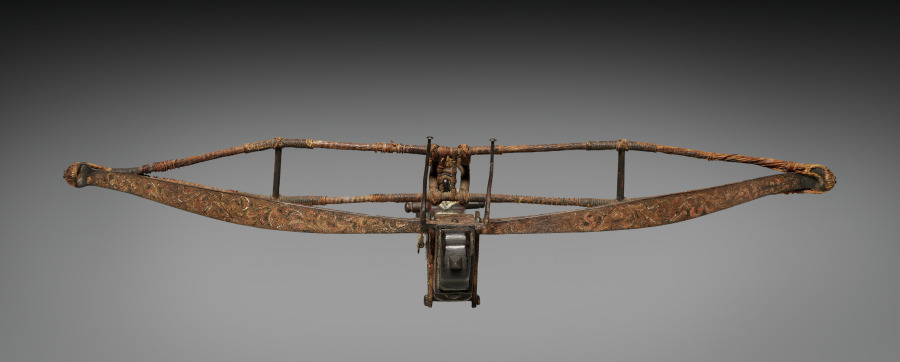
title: Pellet Crossbow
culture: Germany (?)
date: 1600s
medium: wood, inlaid with stag horn; flax cord; steel with traces of paint and gilding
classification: Arms and Armor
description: This ornate pellet crossbow is designed to fire molded clay pellets or small rocks, giving it the name stonebow. The bow is hand drawn and used for hunting small game.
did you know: This is a custom-made crossbow combining popular Italian and German designs of the 1600s.